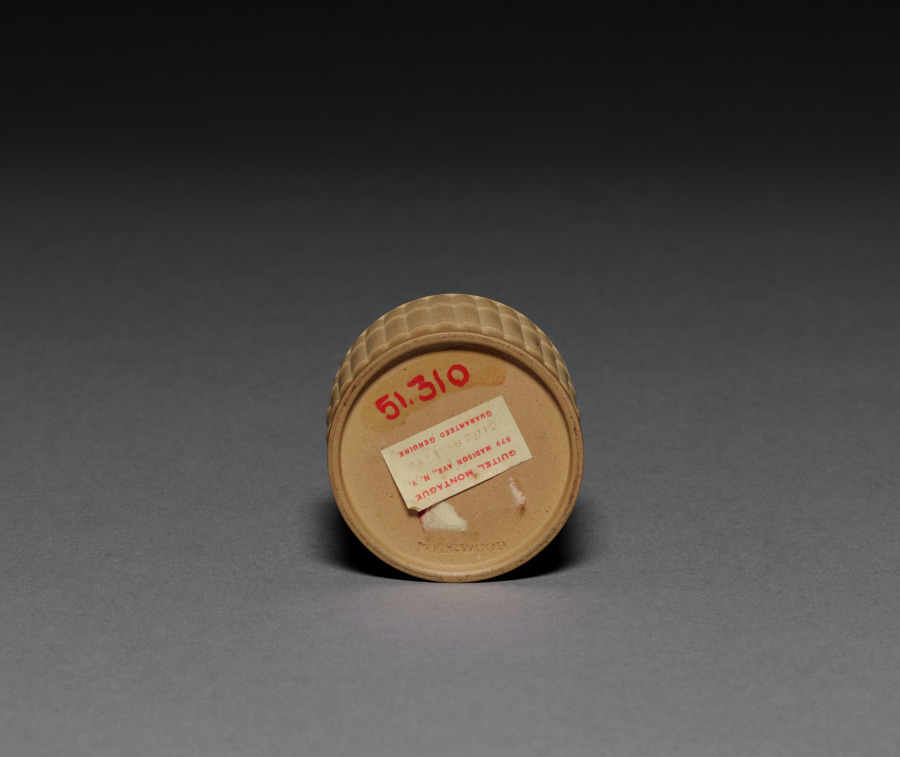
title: Caneware Jar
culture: England, Staffordshire, 18th century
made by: Wedgwood Factory (British)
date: c. 1795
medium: stoneware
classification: Ceramic